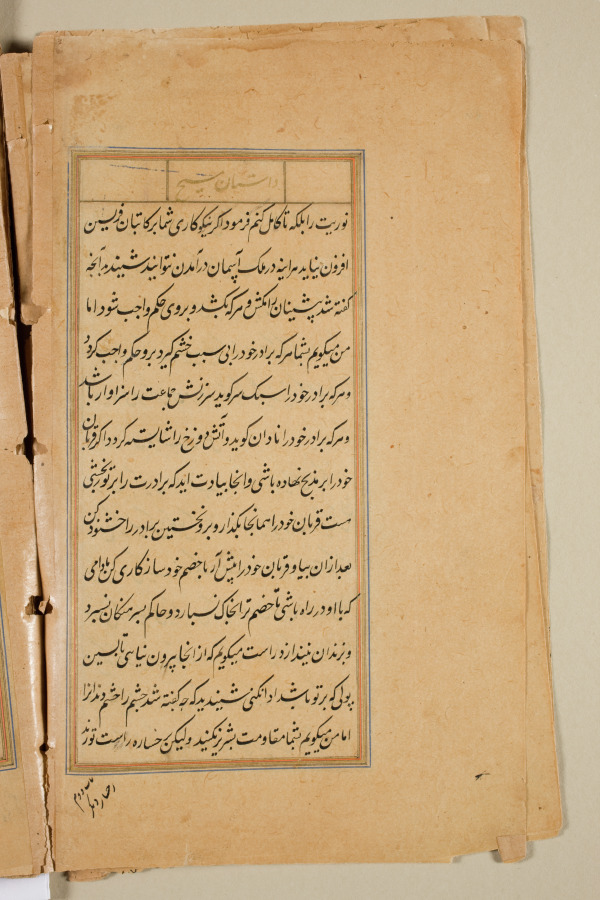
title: Text page from a Mirror of Holiness (Mir’at al-quds) of Father Jerome Xavier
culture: Mughal India, Allahabad, made for Prince Salim (1569–1627)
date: 1602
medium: Ink and gold on paper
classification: Manuscript